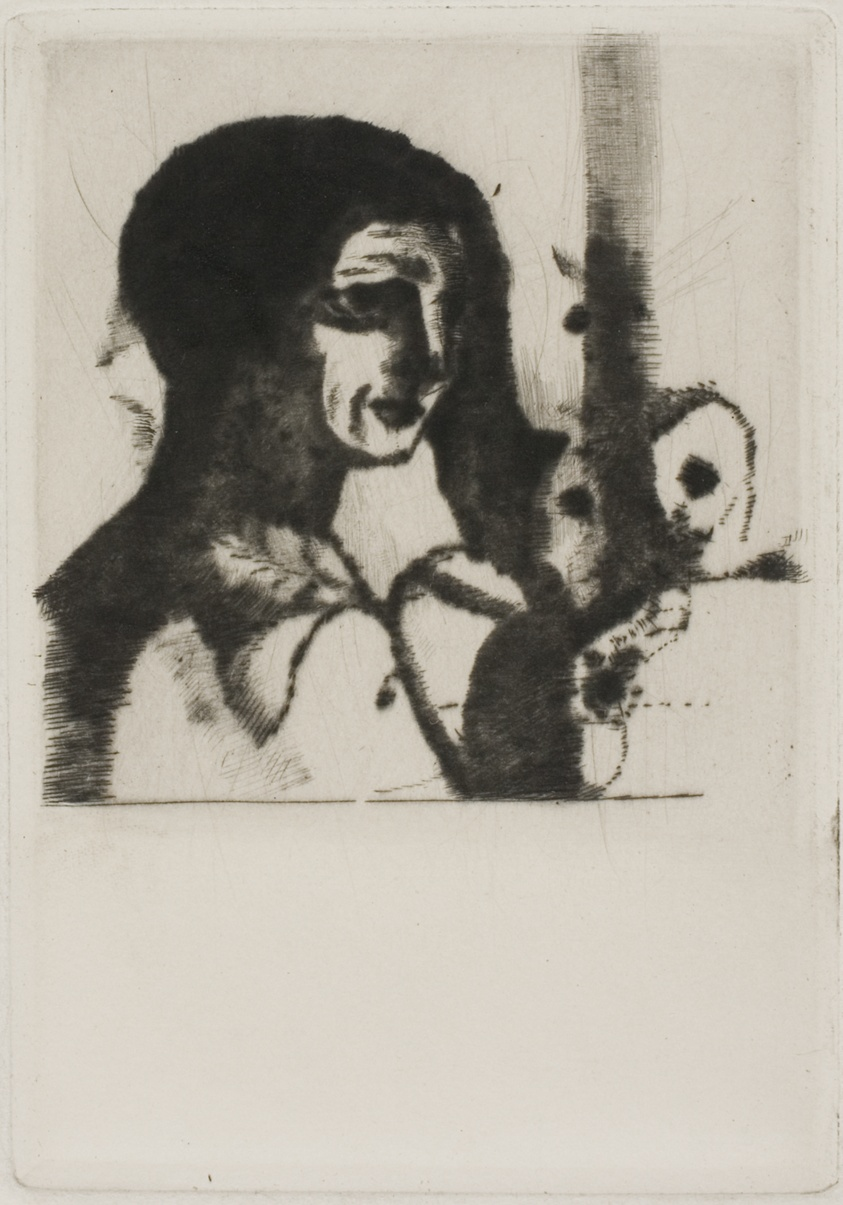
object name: Print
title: Enigma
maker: Odilon Redon (French, 1840-1916)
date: 1892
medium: Drypoint on ivory wove paper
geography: France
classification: drypoint; print; prints and drawing; paper